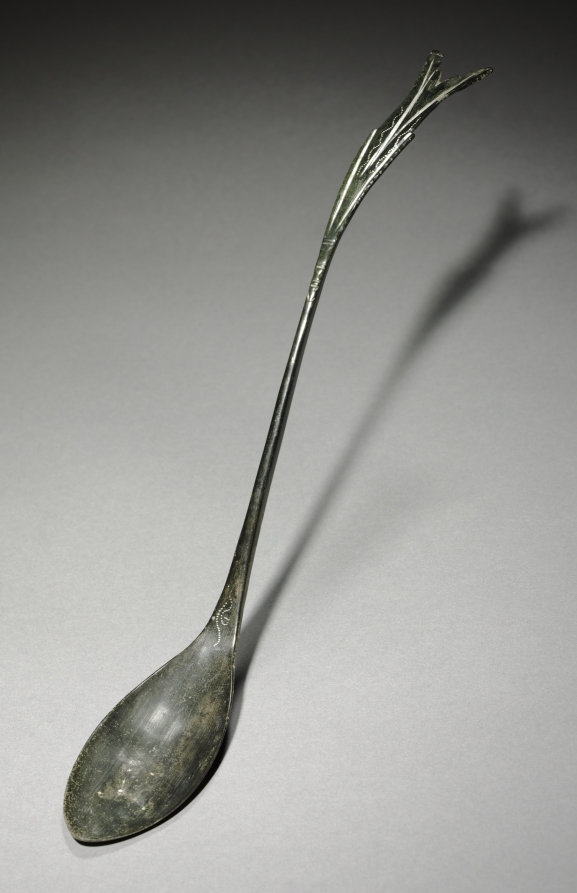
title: Spoon with Fish-Tail Design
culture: Korea, Goryeo dynasty (918–1392)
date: 918–1392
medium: silver bronze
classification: Metalwork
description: Many of Goryeo period spoons like this one feature a curved handle that splits into a jagged fishtail design. This fishtail design is not unique to Korea; it was also widely used in the area under the rule of two non-Han Chinese states: Liao (907–1125) and Jin (1115–1234). These seemingly ordinary objects testify to exciting material interactions between the Goryeo dynasty and non-Han Chinese northern states, which were often omitted from the official records.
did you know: Bronze spoons are the most common burial item. Scholars have proposed that toward the end of the 14th century, Koreans enjoyed meat-based soups more than any other dishes, explaining why spoons became common household items as well as burial goods.